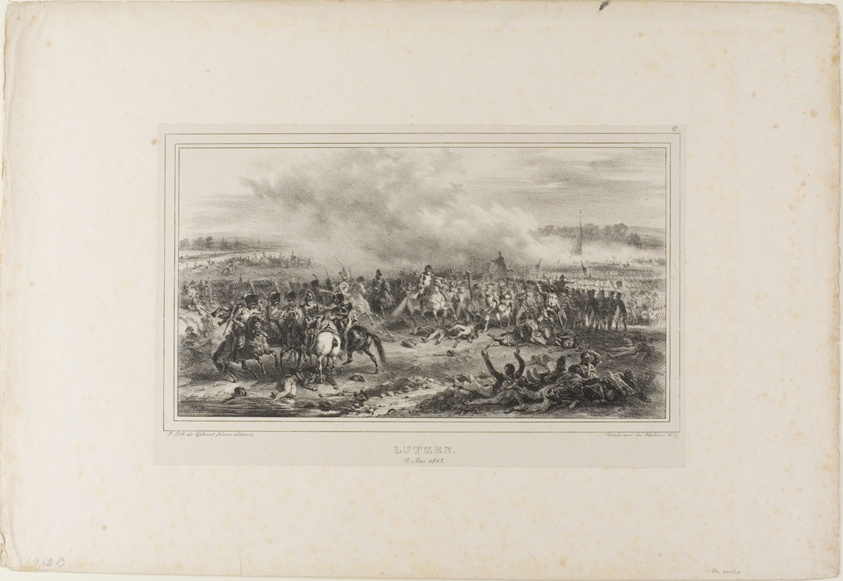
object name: Print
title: Lutzen, May 2, 1813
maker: Denis Auguste Marie Raffet (French, 1804-1860); printed by Chez Gihaut Frères (French, 19th century)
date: 1831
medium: Lithograph in black on gray wove chine laid down on ivory wove paper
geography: France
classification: lithograph; print; prints and drawing